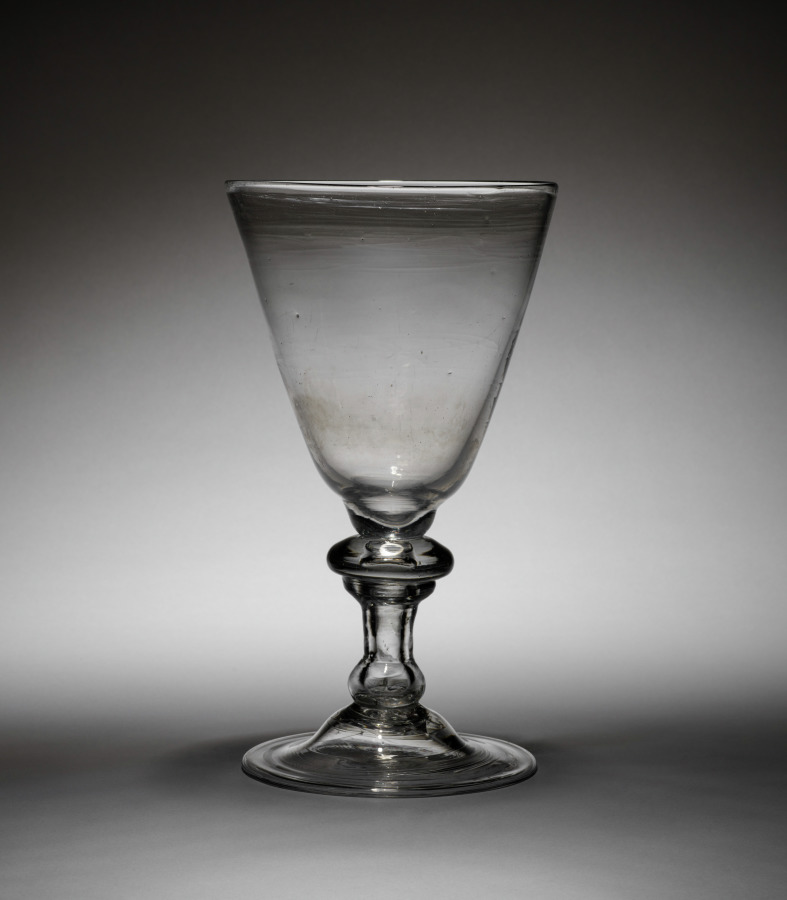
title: Flip Cup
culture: America, early 19th century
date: c. 1800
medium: glass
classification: Glass